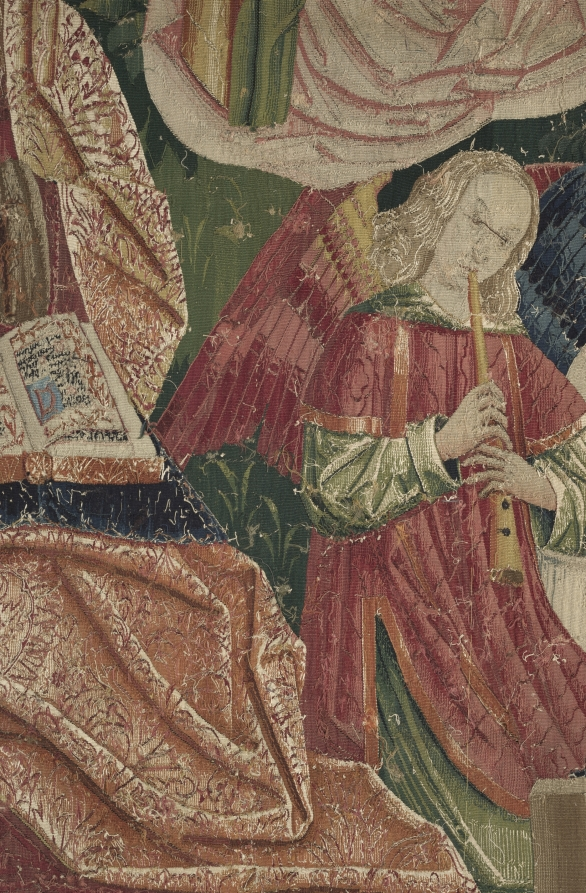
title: The Triumph of Eternity (from Chateau de Chaumont set)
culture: France, Lyon(?), early 16th century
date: 1512–15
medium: silk and wool; tapestry weave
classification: Tapestry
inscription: French verse in Gothic letters translates as follows: "Nothing triumphs by right authority, Unless it be conducted by Eternity. Nothing is permanent beneath the firmament, But above us triumphs Eternity."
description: The Triumph of Eternity is represented by the Coronation of the Virgin. Dressed in crimson velvet with an opulent brocaded velvet shawl, the Virgin is seated in the center as two angels hold a crown over her head. Five musical angels surround her playing an organ, recorder, straight cornetto, harp, and lute, while another sings from an open music book. The scenes in the set display a conservative style in which the figures are placed in shallow landscapes, thereby ignoring pictorial innovations for depicting space and mass. The verse in Old French at the top states: Nothing triumphing by due authority Remains permanent and durable. Nothing is permanent under the heavens, But above, eternity triumphs.